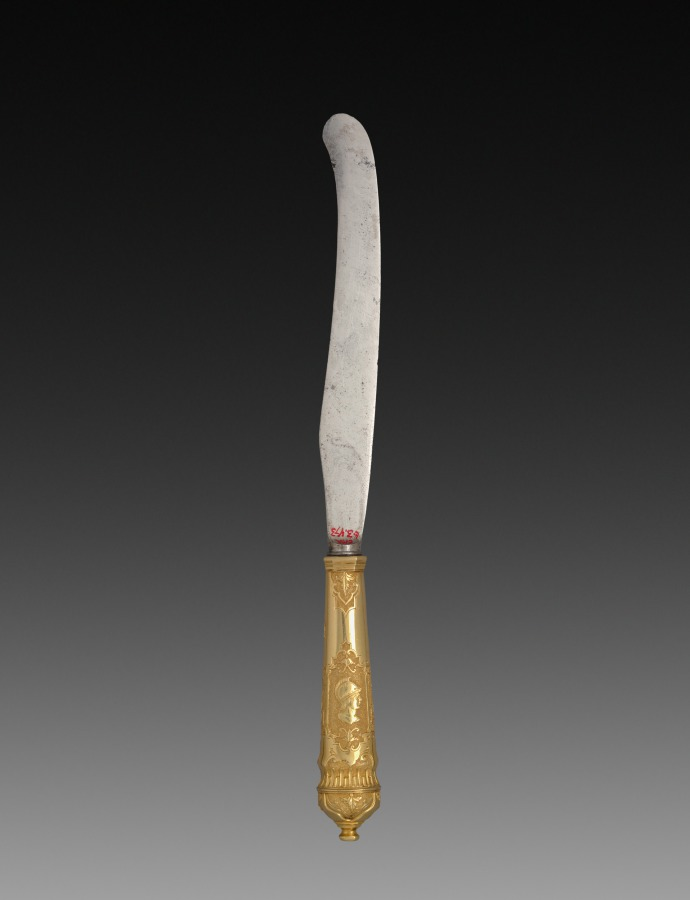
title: Knife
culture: Germany, Augsburg(?), 18th century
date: c. 1725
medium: gold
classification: Metalwork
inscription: steel blade inscribed: UNI(T ?).